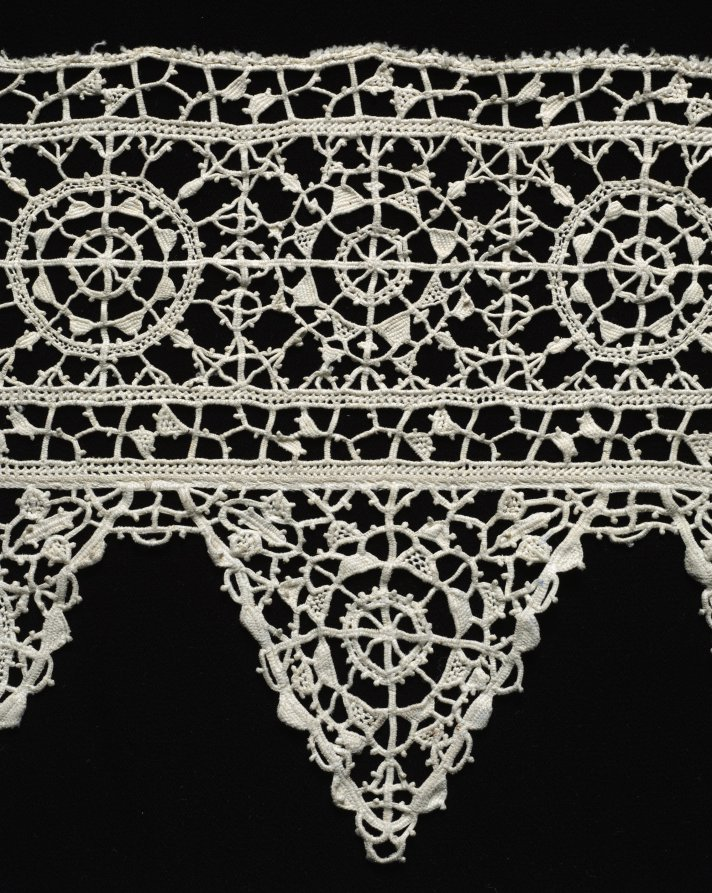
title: Lace Fragment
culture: Italy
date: 1500s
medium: Needle lace (reticella) insertion and edging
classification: Lace